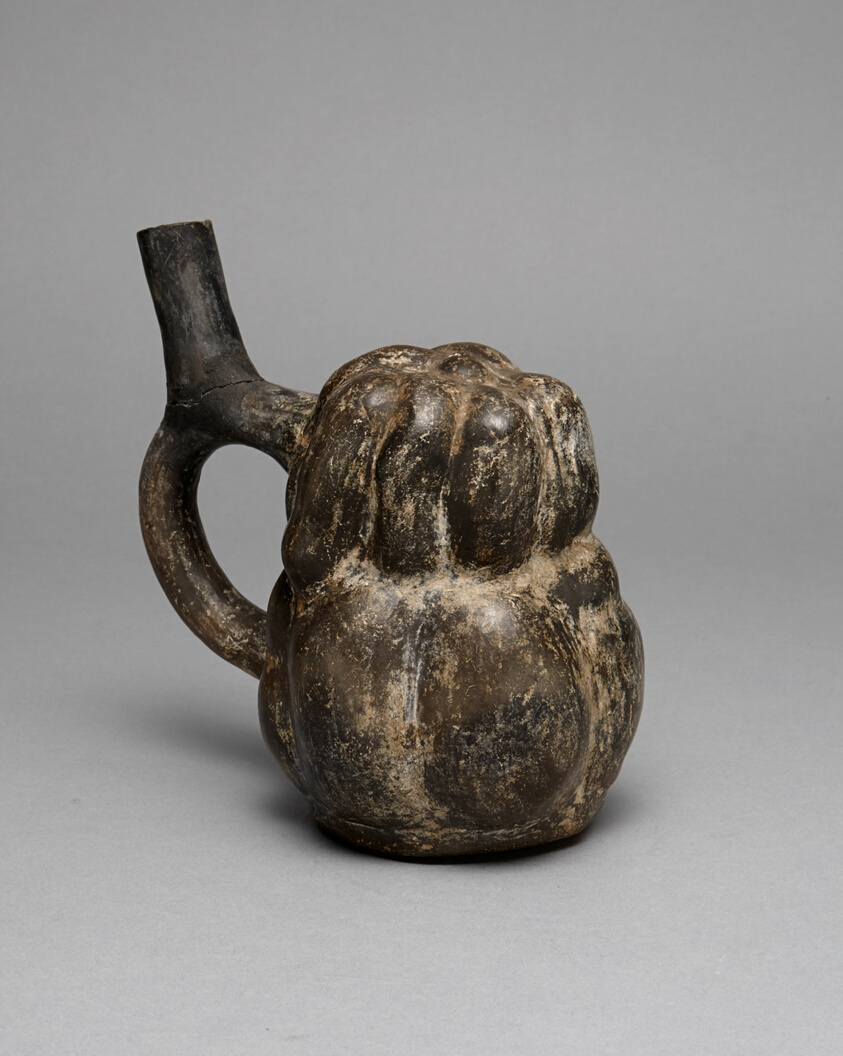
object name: Vessel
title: Spout Vessel in the Form of a Gourd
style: moche, andes, Arts of the Americas, south american, andean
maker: Moche (Chimbote, Santa Valley, north coast, Peru)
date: 250–500 CE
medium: Ceramic and pigment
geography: Santa Valley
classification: blackware (black basaltes); earthenware; ceramics; vessel; art of the americas